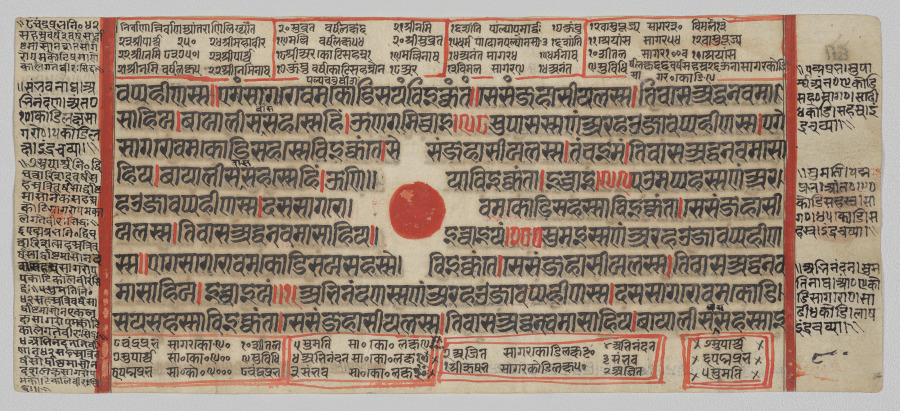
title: Text, Folio 53 (recto), from a Kalpa-sutra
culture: Western India, Gujarat, last quarter of the 15th century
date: c. 1475–1500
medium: Gum tempera, ink, and gold on paper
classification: Painting